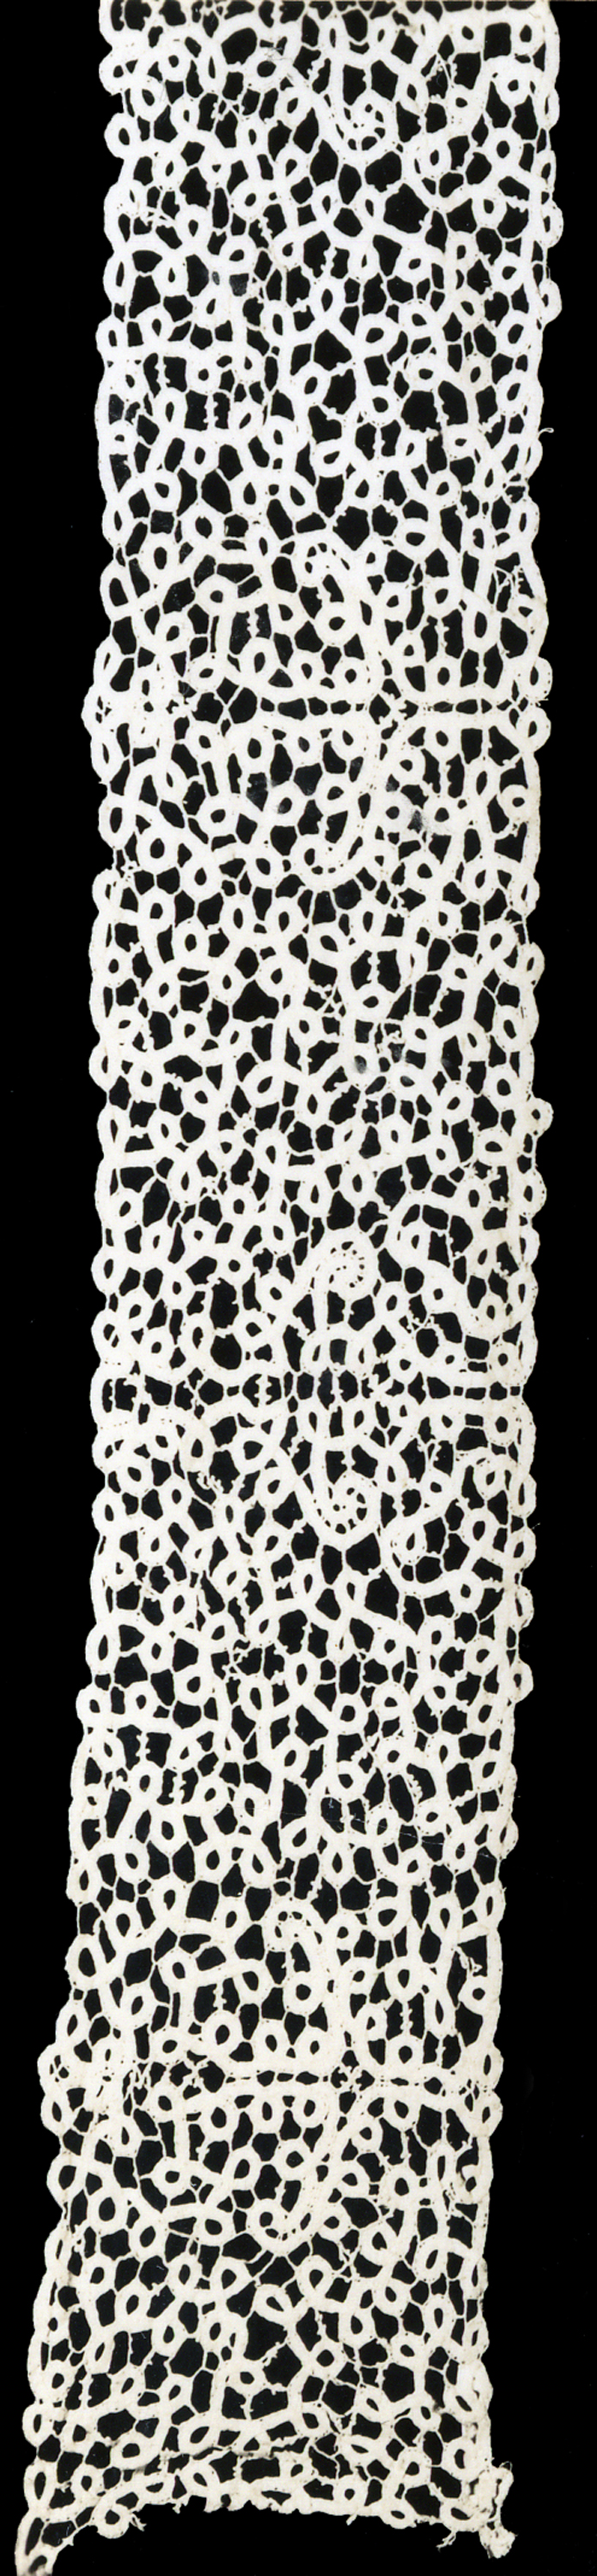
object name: Textile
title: Border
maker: Probably Italy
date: 18th century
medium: Linen, bobbin straight lace; continuous clothwork tapes)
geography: Italy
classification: textile; lace - bobbin